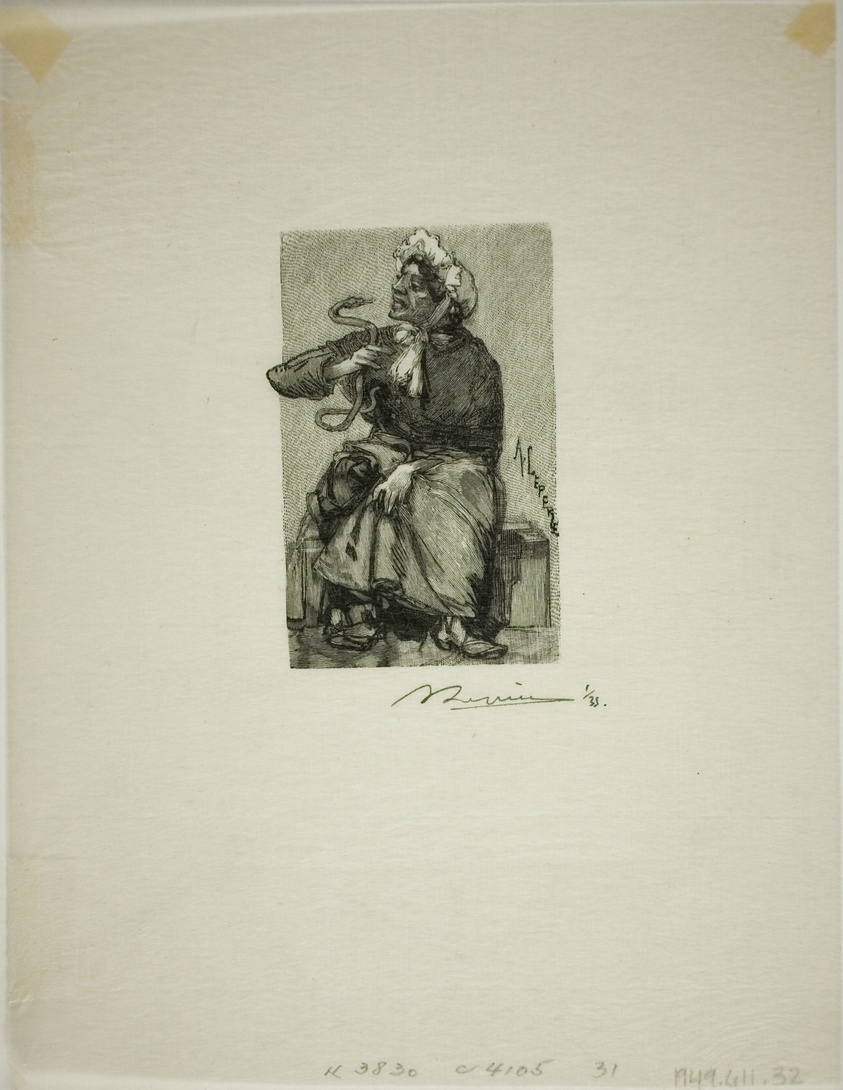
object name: Print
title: Serpent Merchant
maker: Louis Auguste Lepère (French, 1849-1918); published by A. Desmoulins (French, active c. 1908-1910)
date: published 1908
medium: Wood engraving in black on cream laid Japanese paper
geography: France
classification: wood engraving; print; prints and drawing